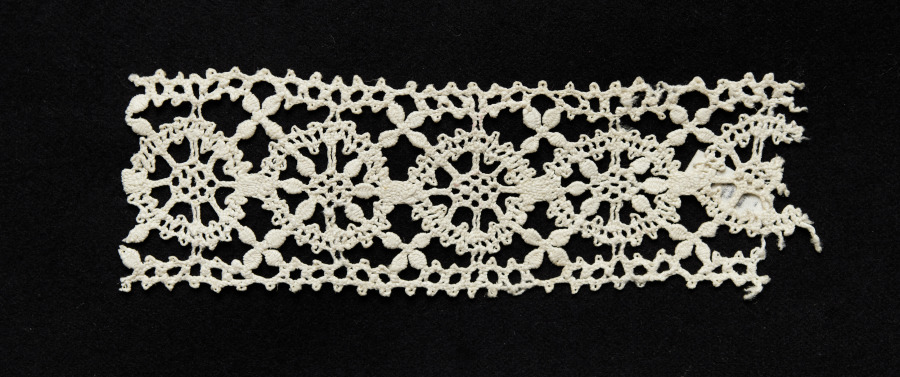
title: Lace Insertion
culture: Italy, Genoa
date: 1550–99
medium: Bobbin lace (needle lace, reticella design)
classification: Lace